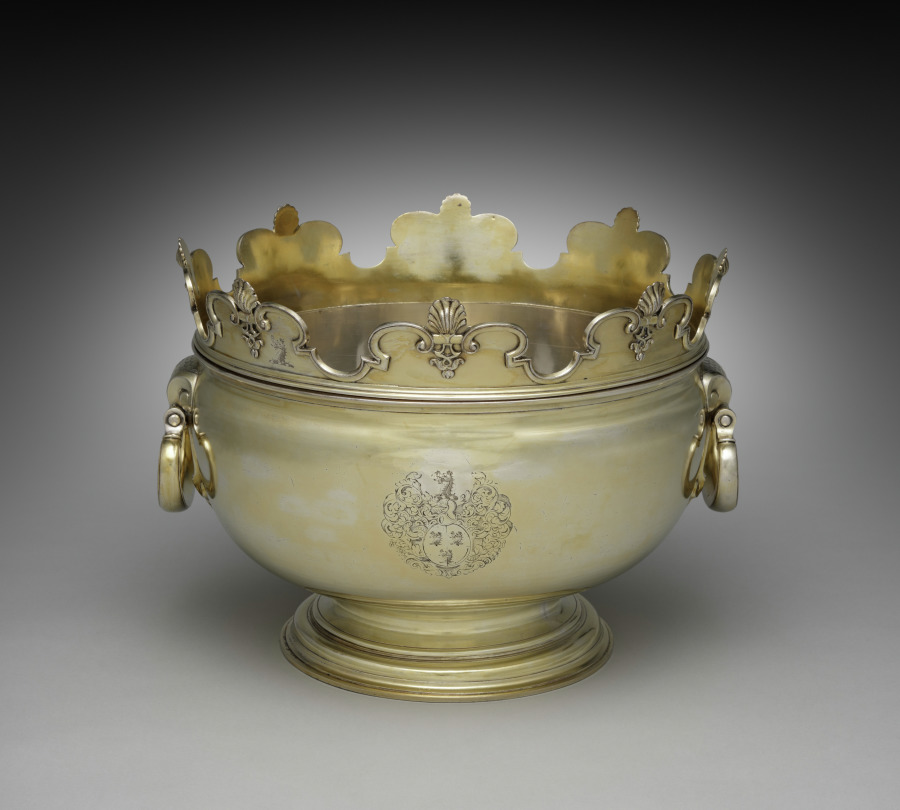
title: Monteith Bowl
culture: England, London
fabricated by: Benjamin Pyne (English, active 1693–1727)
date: 1715–16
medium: silver gilt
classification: Silver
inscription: engraved, center of bowl: arms, crest of Byam family (mantling and helmet were probably engraved at time bowl was made, crest and arms were altered to those of Byam at later date). Rim engraved with Byam Crest (also presumably not original).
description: This bowl’s notched rim allows for glasses to be suspended in water for cooling and cleansing between courses during a long dinner. The rim can be removed and the bowl used for punch as well. A year before Benjamin Pyne began this bowl, he was appointed Subordinate Goldsmith to the King in preparation for George I’s coronation (r. 1714–1727). Like much of his work, this Monteith bowl is characterized by its scale and simplicity.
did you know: The name Monteith is said to come from a mythical Scotsman named Monteigh, who wore cloaks with a similar notched pattern.